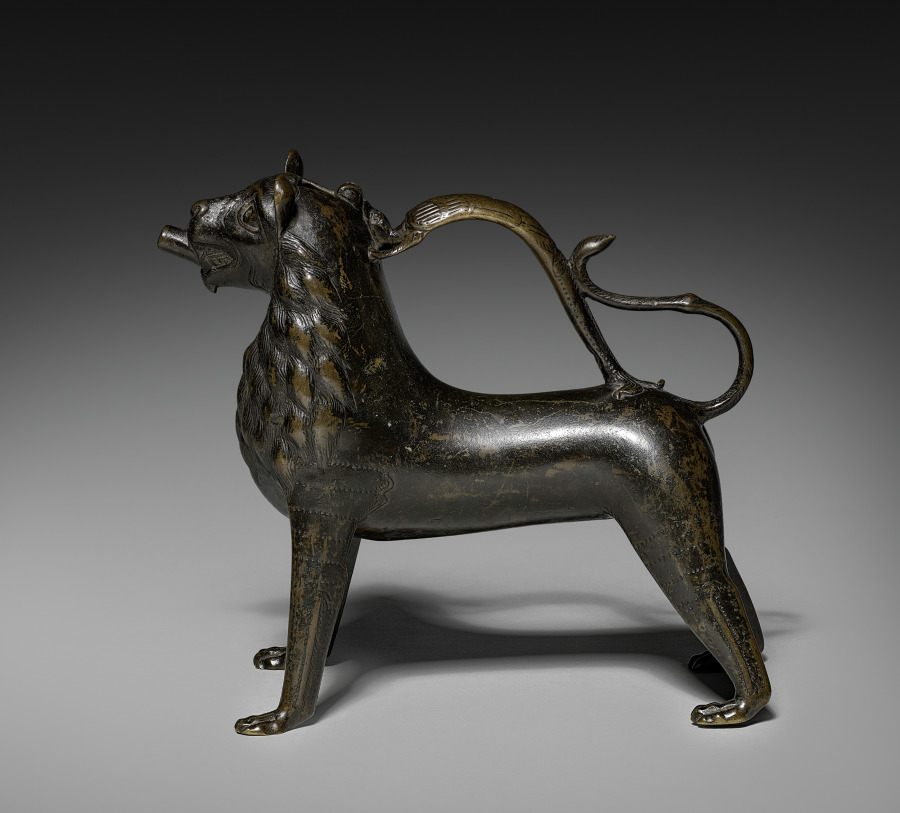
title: Lion Aquamanile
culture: Germany, Lower Saxony, Hildesheim, Gothic period, first half 13th century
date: 1200–1250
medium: bronze: cast, chased, and punched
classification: Sculpture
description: An aquamanile is a water vessel used for washing hands both at church altars and at the dinner tables of upper-class patrons. They often took the form of fantastic beasts such as dragons and unicorns or animals such as horses, birds, dogs, and lions, like this one.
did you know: The handle of this vessel is in the shape of a dragon with a long curving tail.